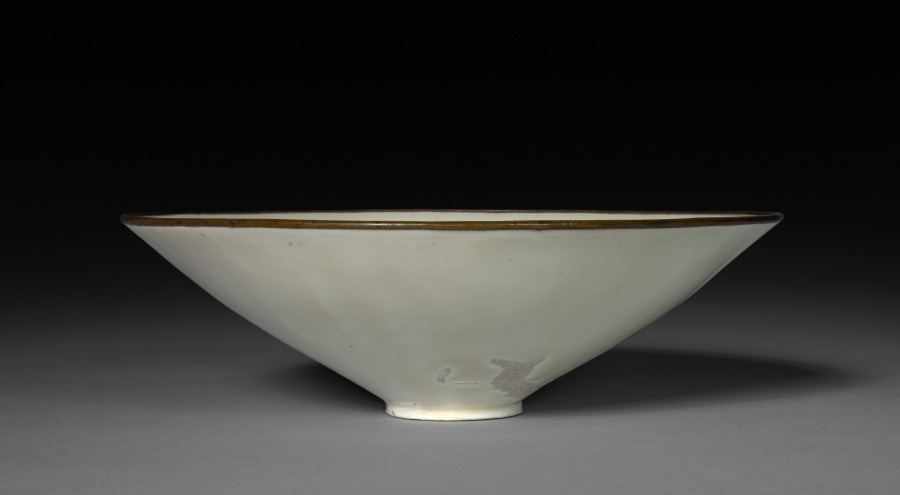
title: Bowl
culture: China, Hebei province, Chuyang District, Jin dynasty (1115-1234)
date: 12th Century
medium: White porcelain, Ding ware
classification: Ceramic